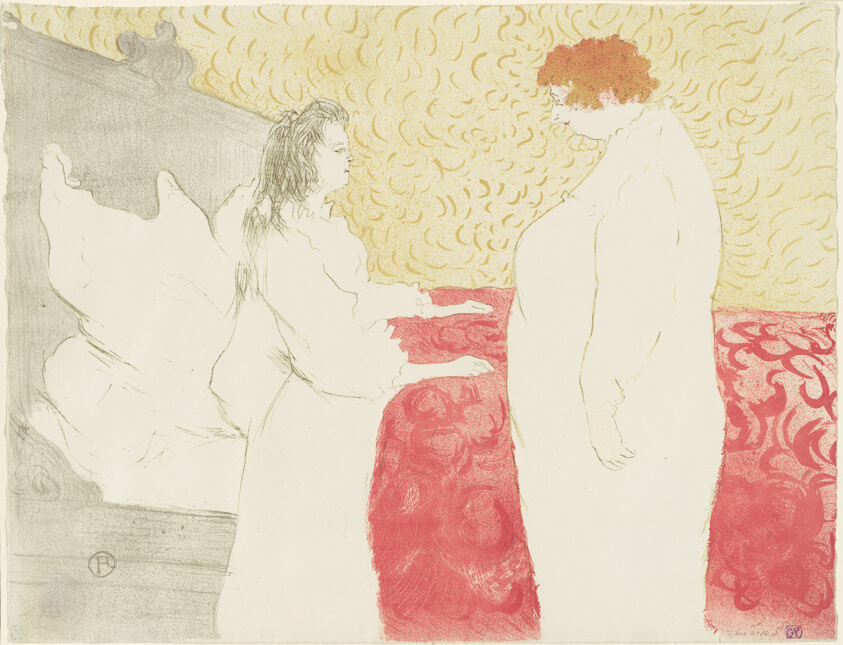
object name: Print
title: Woman in Bed, Profile, Getting Up, plate eight from Elles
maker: Henri de Toulouse-Lautrec (French, 1864-1901); published by Gustave Pellet (French, 1859-1919); probably printed by Auguste Clot (French, 1858-1936)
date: 1896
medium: Color lithograph on ivory wove paper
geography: France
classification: lithograph; print; prints and drawing